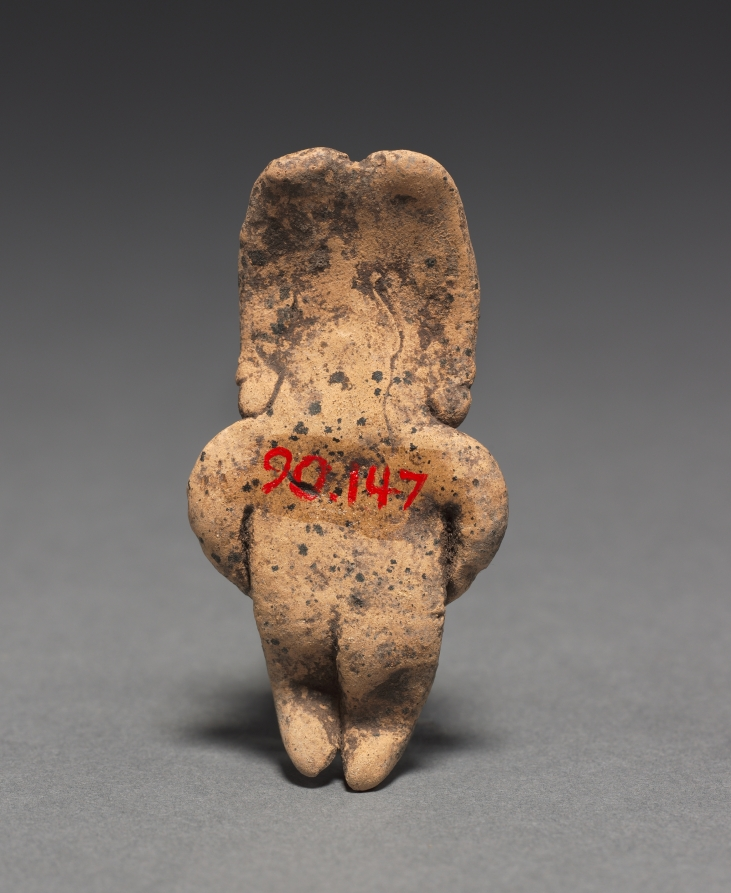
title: Figurine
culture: Mesoamerica, Mexico, Guanajuato, Chupícuaro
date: 400–100 BCE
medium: pottery with traces of white and red pigment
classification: Sculpture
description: The Chupícuaro culture, located north of Mexico City in the state of Guanajuato, created a distinctive ceramic tradition including small clay figurines. This example is said to belong to a group of ten figurines from the same burial or cache (1990.145–154). The group includes both males and females that can be sorted into couples based on size.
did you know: Groups of figurines were sometimes arranged in scenes and likely used in household rituals.